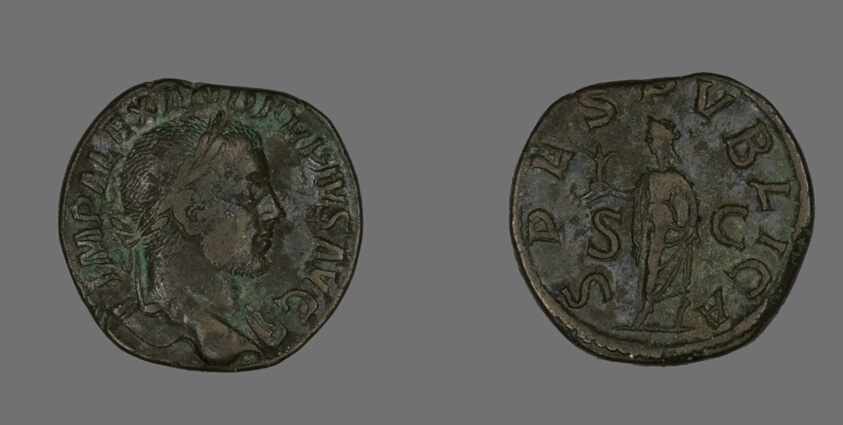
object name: Coin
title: Sestertius (Coin) Portraying Emperor Severus Alexander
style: roman (ancient, style or period)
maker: Roman, minted in Rome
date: 232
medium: Bronze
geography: Roman Empire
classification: coin; ancient art